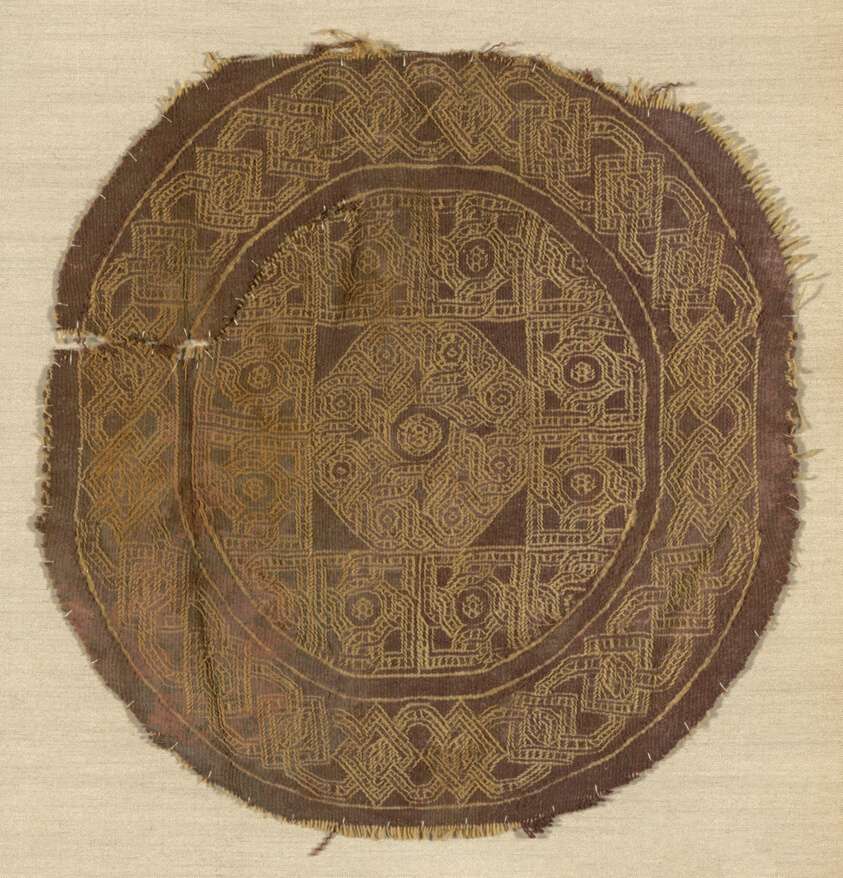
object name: Textile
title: Roundel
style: roman period (egyptian)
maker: Coptic (Egypt)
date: Roman period (30 B.C.– 641 A.D.), 3rd/5th century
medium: Linen and wool, tapestry weave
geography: Egypt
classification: textile; weaving